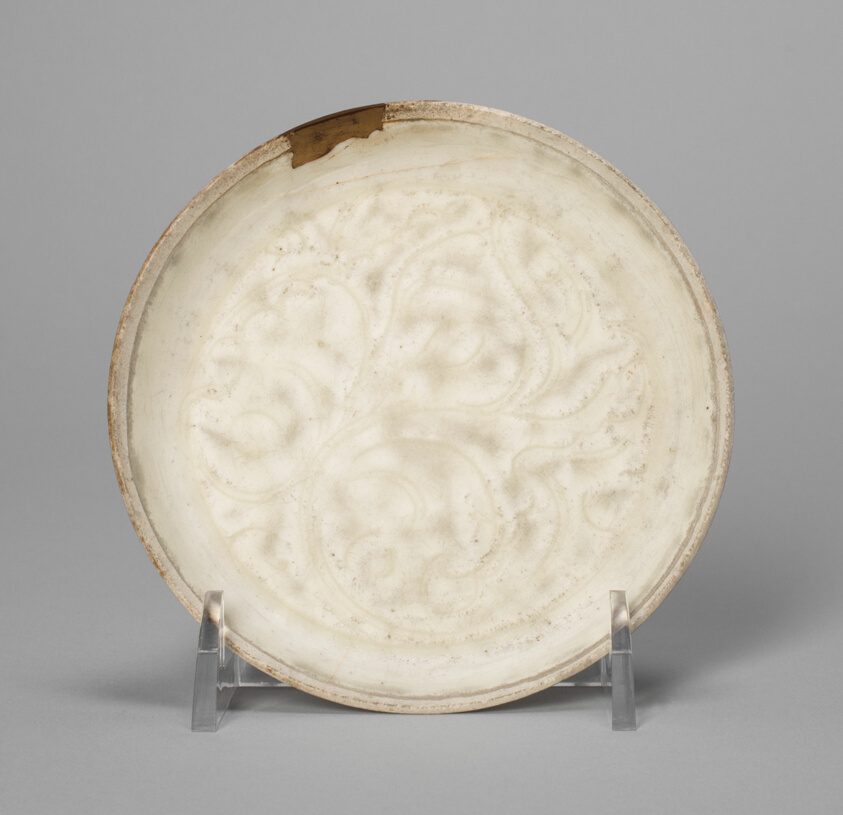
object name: Vessel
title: Dish with Floral Scrolls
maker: China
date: Song dynasty (960–1279)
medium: Stoneware with underglaze incised decoration and gold repair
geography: China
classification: ceramics; asian art